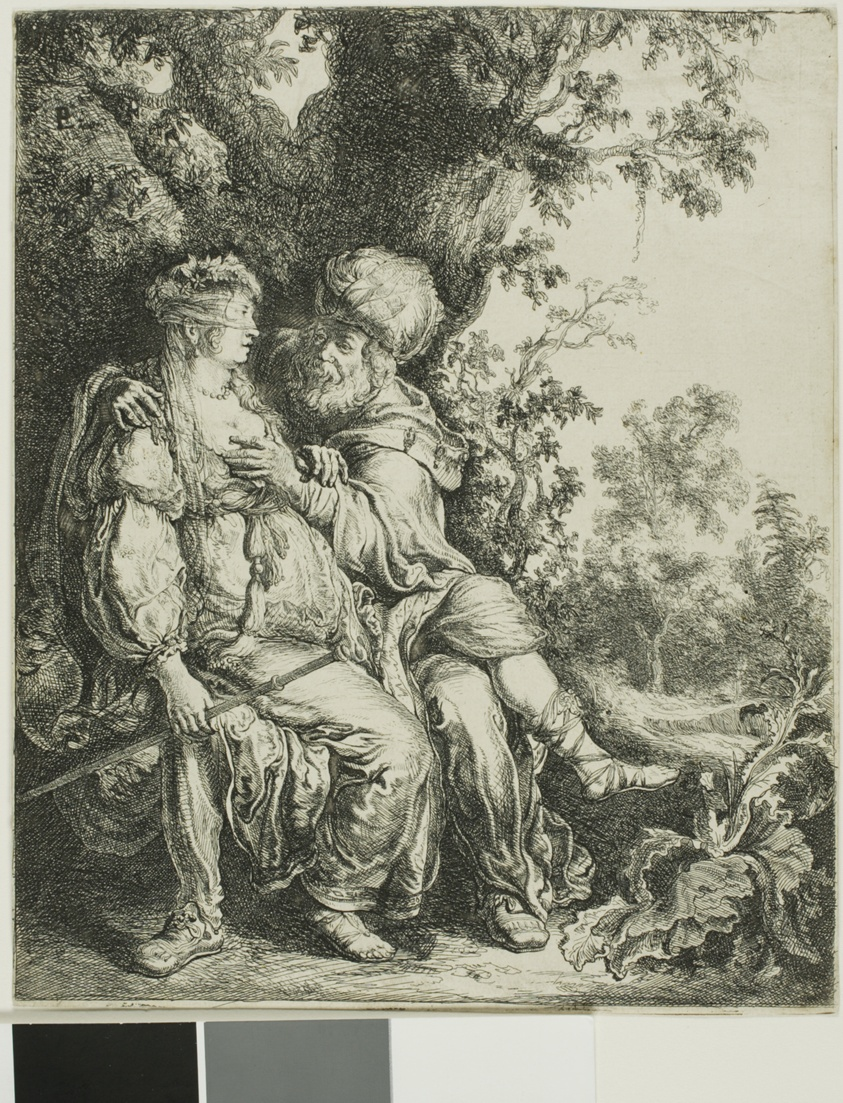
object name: Print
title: Juda and Thamar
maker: Pieter Lastman (Dutch, 1583-1633)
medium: Etching on ivory laid paper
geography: Holland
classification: etching; print; prints and drawing